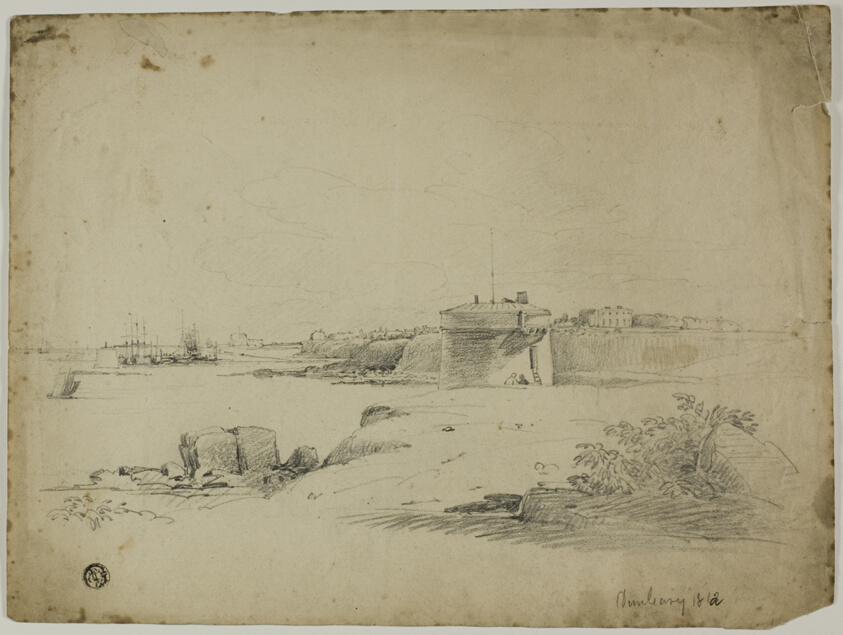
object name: Drawing and Watercolor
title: Dunleavy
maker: Unknown Artist; United Kingdom, 19th century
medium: Graphite on tan wove paper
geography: United Kingdom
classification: graphite; drawings (visual works); prints and drawing